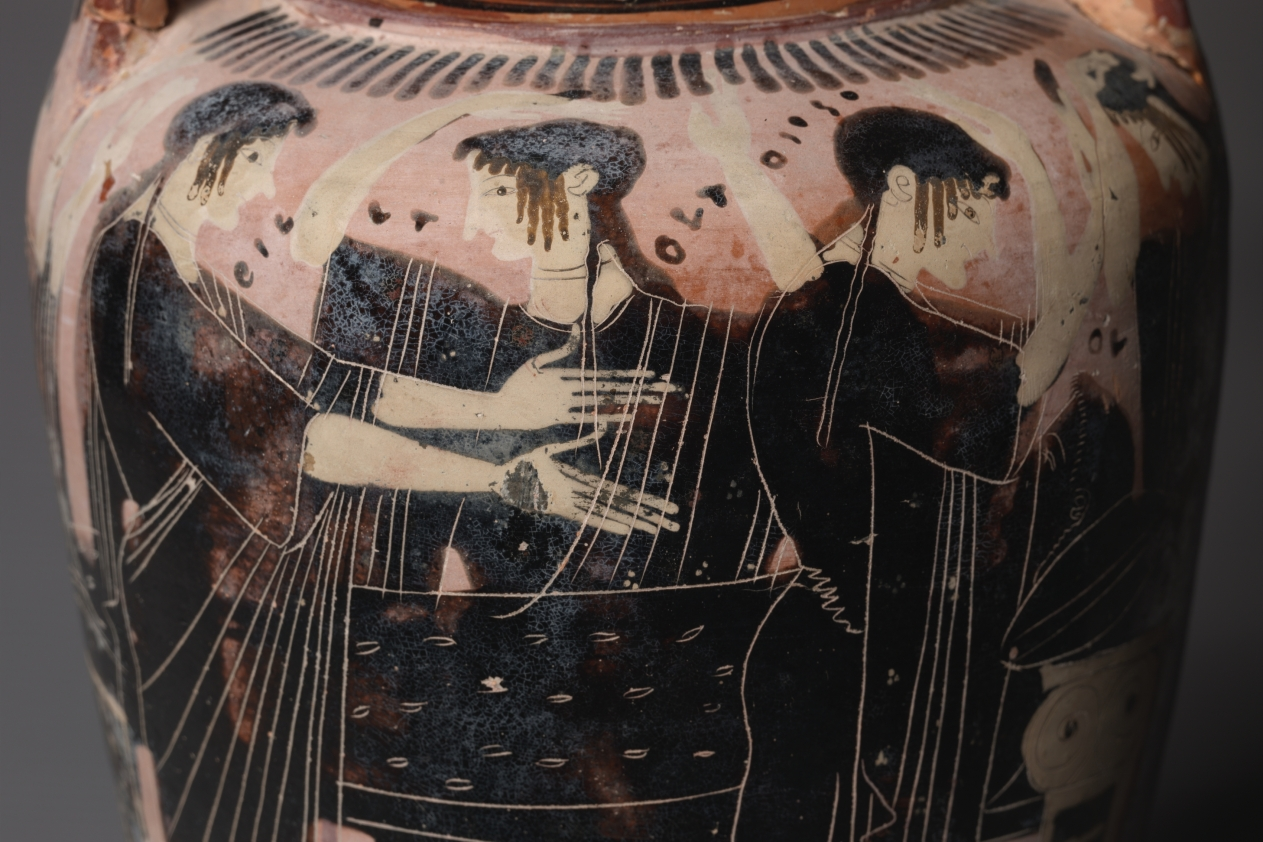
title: Black-Figure Loutrophoros-Amphora (Ritual Water Vessel): Prothesis (Laying out of Corpse), Mourners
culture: Greek, Attic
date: c. 500 BCE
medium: ceramic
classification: Ceramic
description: The loutrophoros, a tall-necked water vessel, served two main purposes in ancient Athens. In life, it carried sacred spring water for ceremonial pre-marriage baths. After death, it marked the tomb of an unmarried person, as if to account for that not experienced in life. Often, as here, it has no bottom, permitting offerings to flow through to the grave. Both the precise shape of this vase—a two-handled loutrophoros-amphora rather than a three-handled loutrophoros-hydria—and its depiction of the deceased suggest the commemoration of a departed man (rather than a woman). The iconography is entirely funerary, with multiple mourning figures shown: four women on the neck; six women surrounding the corpse on its bier; and three men making farewell gestures. The inscriptions near some of the mourning women do not spell out real words but may represent their sorrowful cries.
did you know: Mourning figures wrap all the way around this vessel, even beneath the handles.